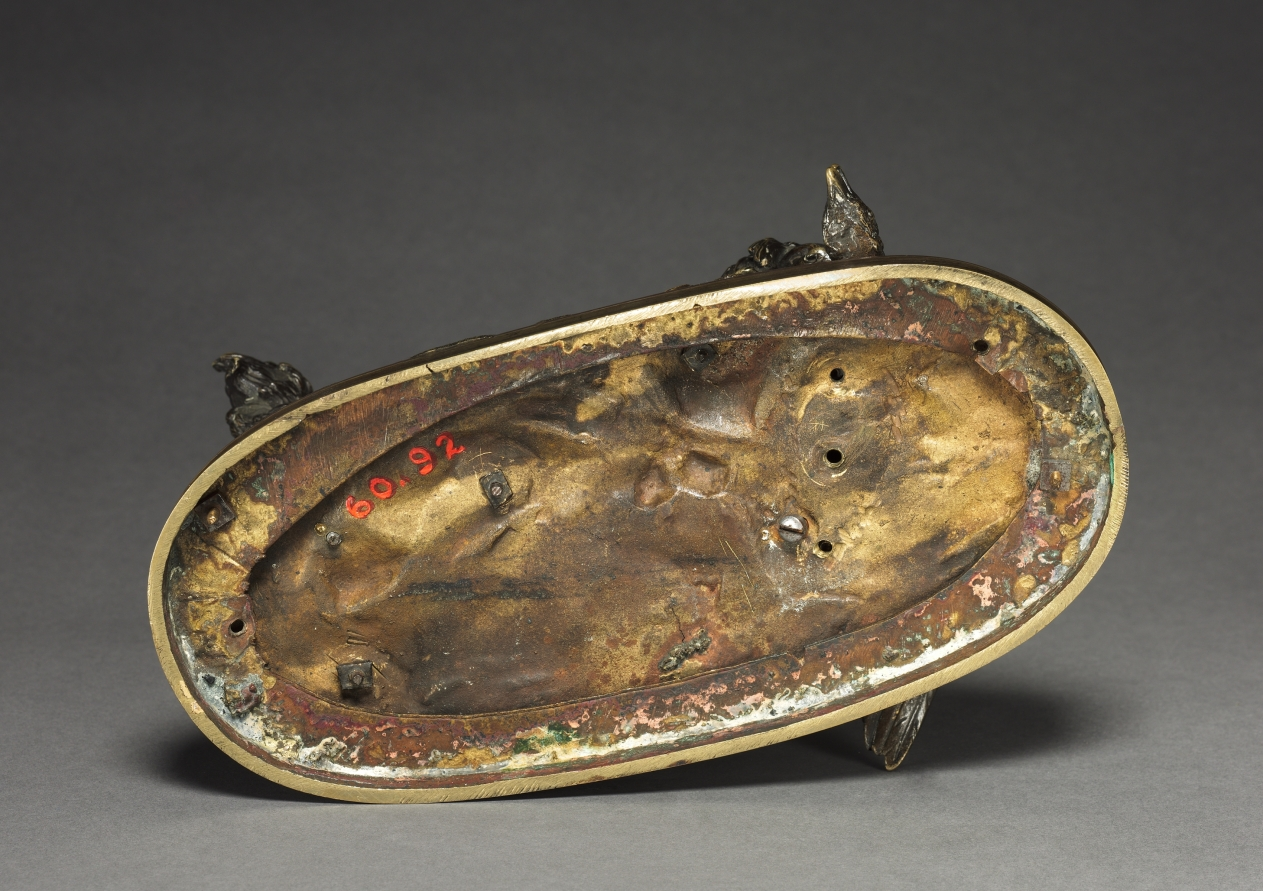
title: Spaniel and Duck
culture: France, 19th century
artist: Antoine-Louis Barye (French, 1796–1875)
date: c.1830 – 1875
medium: bronze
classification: Sculpture